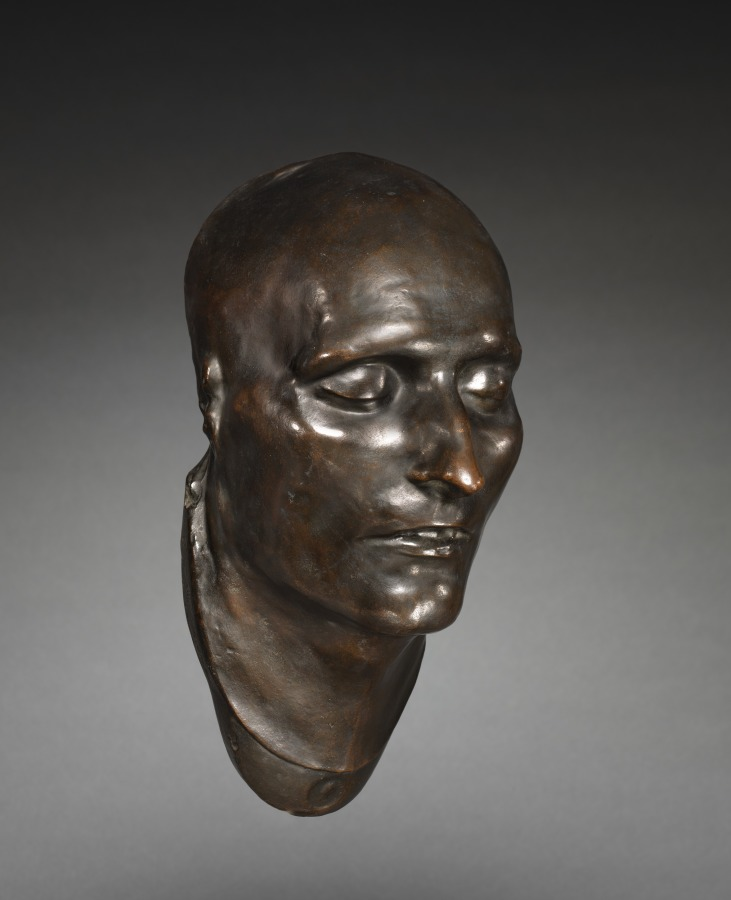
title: Mask of Napoleon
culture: Italy, 19th century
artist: C. Francesco Antommarchi (Italian, 1780–1838)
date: early 19th century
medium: bronze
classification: Sculpture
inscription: Signed on one side, inscribed on the other: "A Loie Fuller. E. Rudier, fondeur"